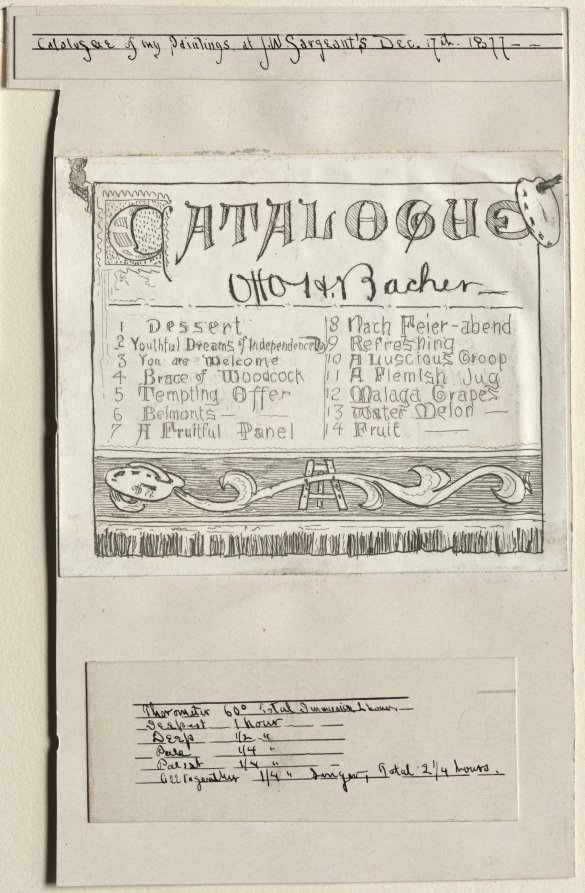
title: Catalogue of My Paintings at J. W. Sargents, Cleveland, December 17th, 1877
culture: America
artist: Otto H. Bacher (American, 1856–1909)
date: 1877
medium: etching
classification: Print